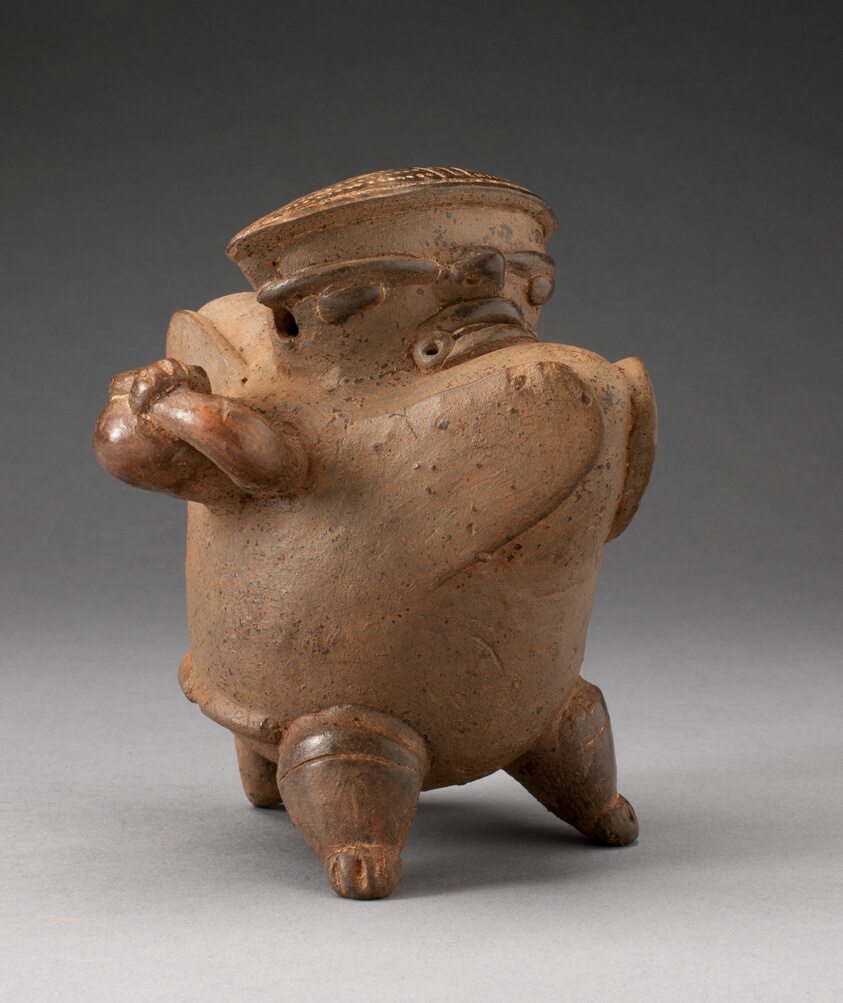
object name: Vessel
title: Vessel in the Form of a Hunchback Figure Carrying a Jar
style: nicoya, Arts of the Americas, lower central america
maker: Nicoya (Costa Rica)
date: 1200–1500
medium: Ceramic and pigment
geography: Costa Rica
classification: earthenware; art of the americas; ceramics; vessel